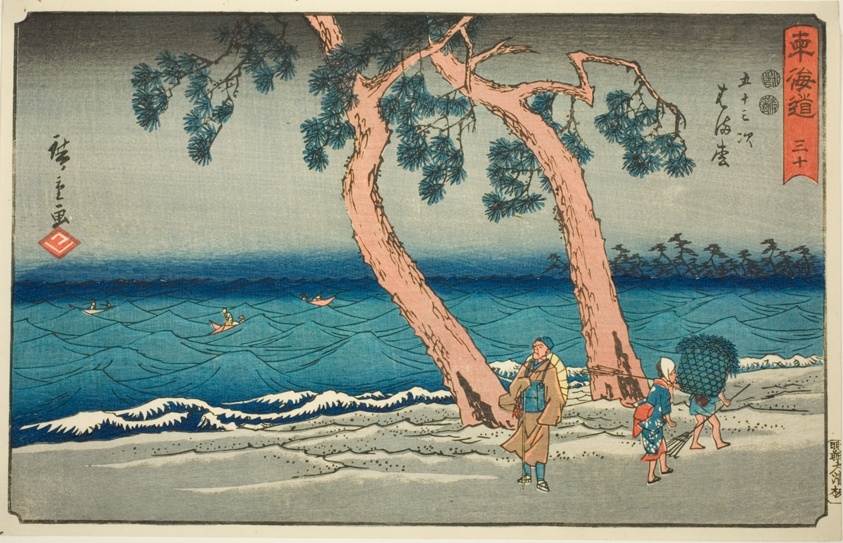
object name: Print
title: Hamamatsu—No. 30, from the series "Fifty-three Stations of the Tokaido (Tokaido gojusan tsugi)," also known as the Reisho Tokaido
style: Japanese (culture or style)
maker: Utagawa Hiroshige 歌川 広重; Japanese, 1797-1858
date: c. 1847/52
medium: Color woodblcok print; oban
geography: Japan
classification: woodblock print; print; asian art